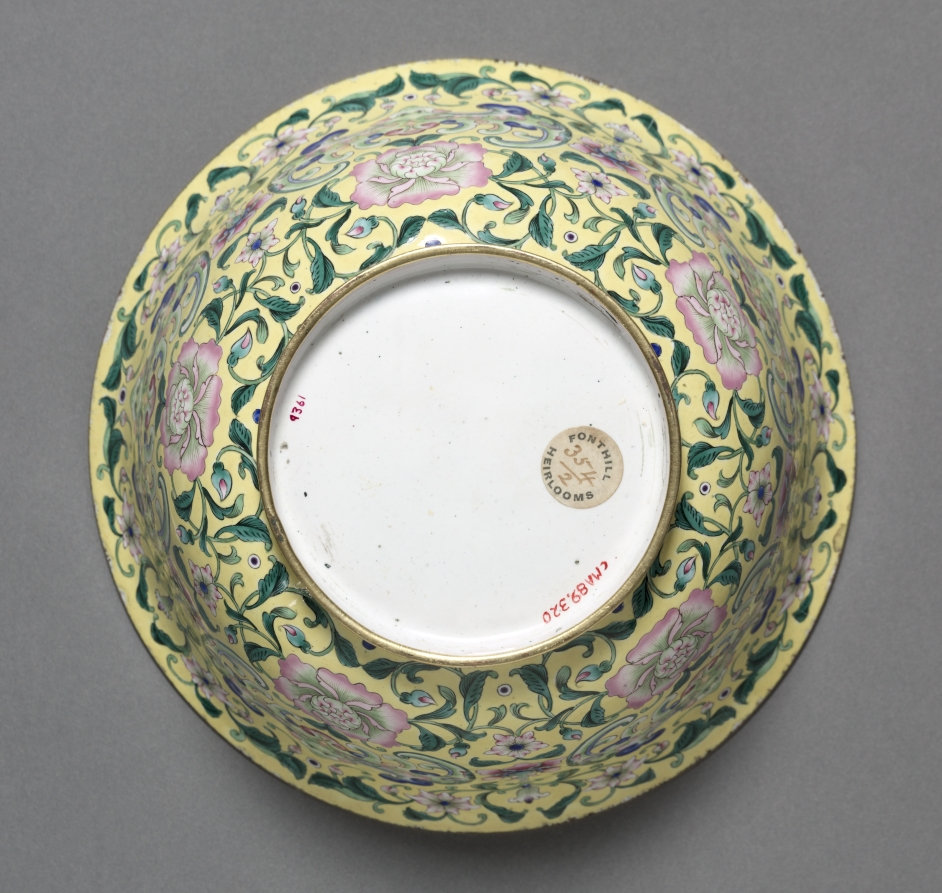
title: Bowl with Bats and Floral Scrolls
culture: China, Qing dynasty (1644–1911), Qianlong reign (1736–95)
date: 1736–95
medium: Canton enamel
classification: Enamel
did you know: The bat is a lucky symbol as the Chinese word for bat, 蝠 fú, is pronounced the same as “good fortune” 福.